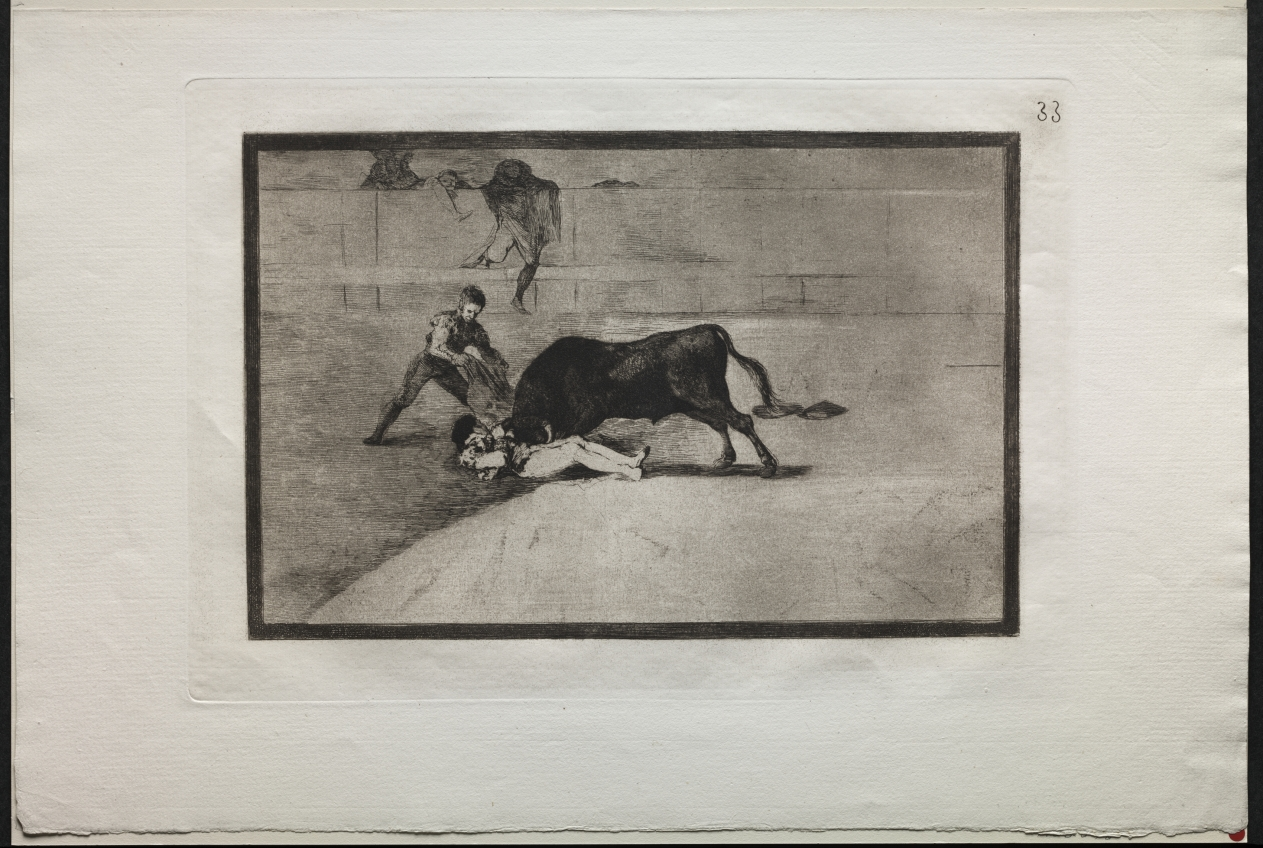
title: Bullfights: The Unlucky Death of Pepe Illo, in the Ring at Madrid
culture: Spain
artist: Francisco de Goya (Spanish, 1746–1828)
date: 1816, printed 1876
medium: engraving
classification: Print